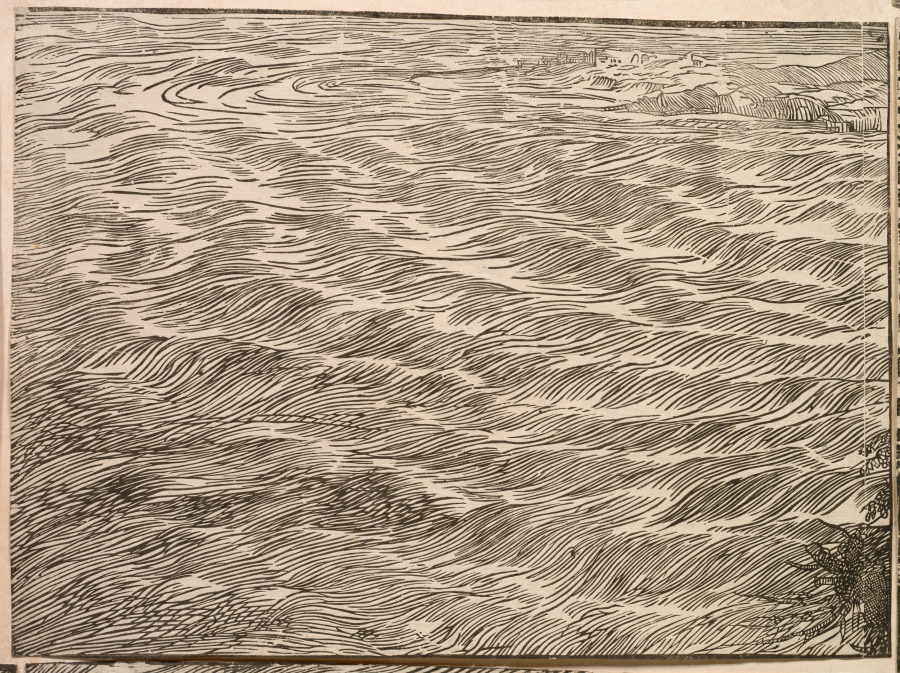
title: The Submersion of Pharaoh's Army in the Red Sea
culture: Italy, Venice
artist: Titian (Italian, c. 1488–1576)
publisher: Domenico dalle Greche (Italian, 1503–1603)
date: 1514–15, printed 1549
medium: woodcut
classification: Print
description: To make this monumental woodcut—considered one of the most ambitious prints of the Renaissance—Titian probably drew directly on the wooden blocks, after which a skilled cutter completed the blocks. The size rivals that of a painting, and the composition would have hung on a wall. Titian’s bold vision presents nature as a vehicle of God’s mercy and wrath. Moses, at right, having parted the seas for the Israelites to pass, commands them to close over the Egyptian forces (Exodus 14:21–31). Titian propelled the narrative with remarkable unity, dedicating entire blocks to the turbulent sea and rolling clouds that culminate in a magnificent cliff and Renaissance city. Some have interpreted the scene as an allegory of Venice’s troubles with the League of Cambrai, a military alliance that threatened the island city.